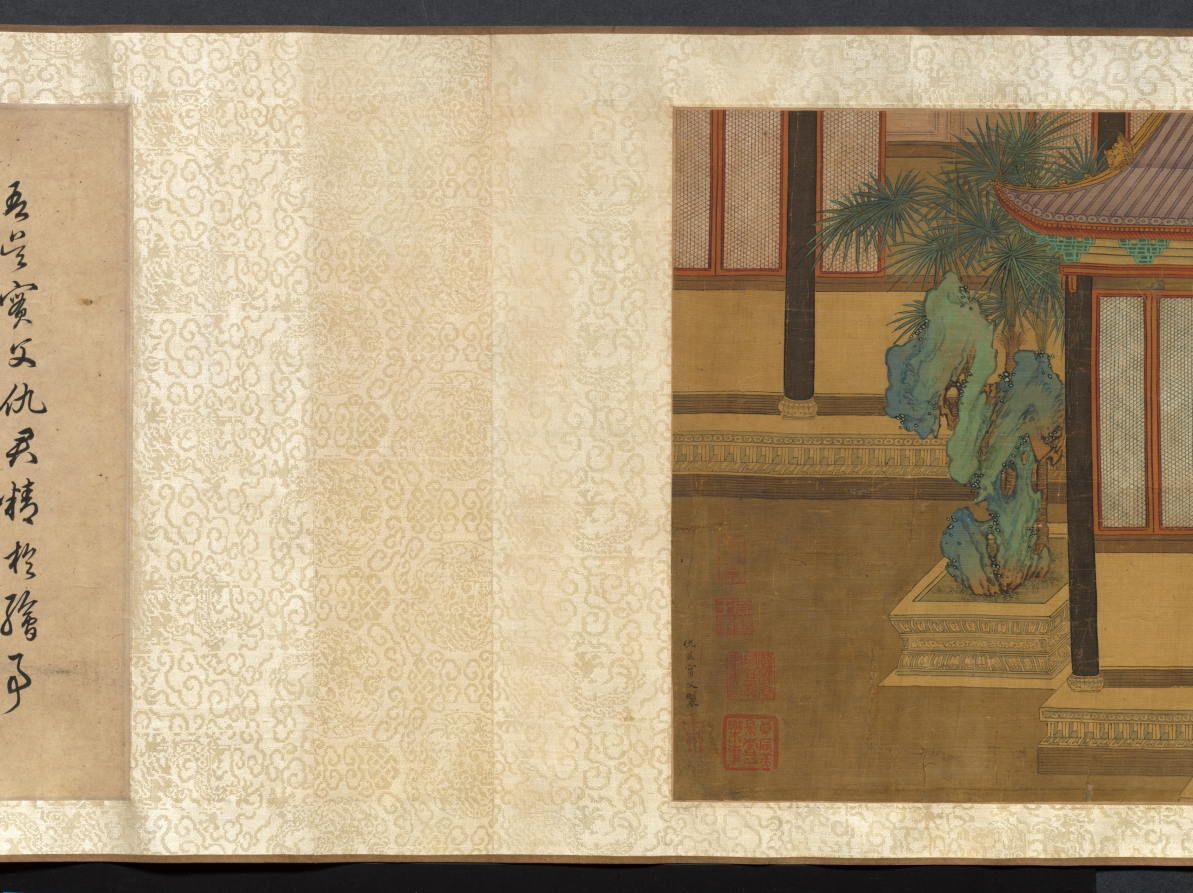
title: Palace Ladies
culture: China, Qing dynasty (1644-1911)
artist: copy after Qiu Ying (Chinese, 1494–1552)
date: 1644–1911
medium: handscroll, ink and color on silk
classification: Painting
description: This handscroll illustrates the pursuits of court ladies in a palace precinct on a spring day. Women, young girls, and their maids amuse themselves by sitting on a swing, playing games, watering and admiring peonies, performing music together, playing the qin (zither), feeding a parrot on the balustrade and fish in the water, or catching butterflies. The life of elite women was mostly restricted to the so-called inner quarters, meaning the garden and inner courts of the house. This painting idealizes the world of young palace girls that in fact was often filled with boredom and waiting for a lover.